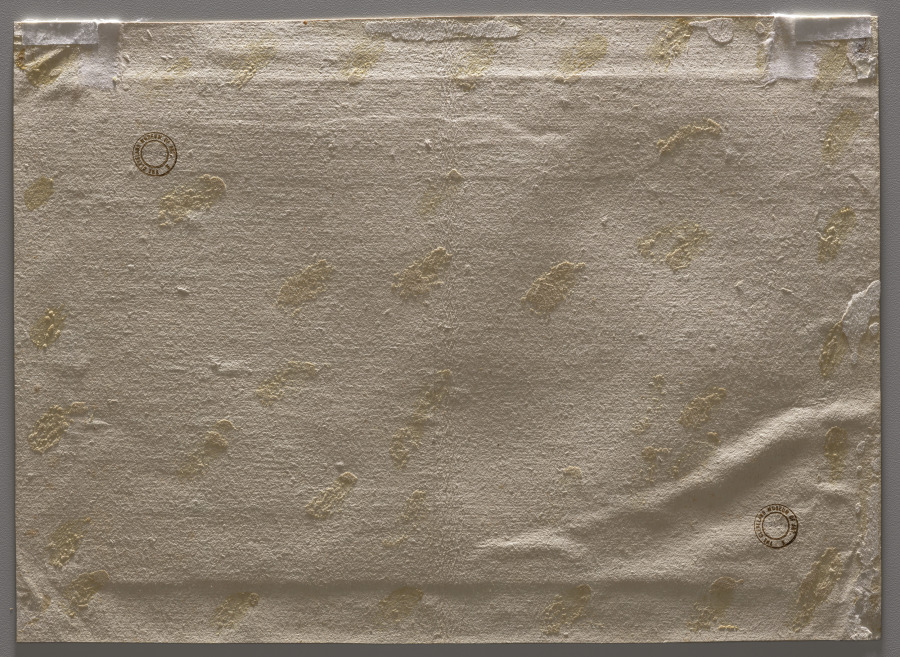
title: Saint Jerome in a Landscape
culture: Italy, 16th century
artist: Domenico Campagnola (Italian, 1500–1564)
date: c. 1530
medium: pen and brown ink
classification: Drawing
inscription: RECTO OF MOUNT, lower left, in graphite: 61 [6 crossed out, 1 underlined] / 236 [underlined] ; lower center, in graphite: Titian [inscribed in a cartouche] ; lower center, in graphite: 3 ; lower right, in graphite: 8930 [erased] ; lower right, in graphite: [illegible]/q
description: Domenico Campagnola helped to establish a specialized collector’s market for landscape drawings, building upon the legacy of his father, Giulio Campagnola, and Titian. Like Titian, Domenico’s works emphasize God’s power as expressed through the natural world. Hermit Saint Jerome, at lower left, sits in spiritual contemplation within a dynamic landscape rendered with Domenico’s distinctive linear style, complete with rustic houses, humble tree groves, and grand distant vistas. Independent drawings (drawings made as works of art in and of themselves) were a new category of drawing advanced by Domenico and others.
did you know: Domenico Campagnola was one of the first artists in Renaissance Italy to create drawings such as this as ends in themselves rather than as preparatory studies.